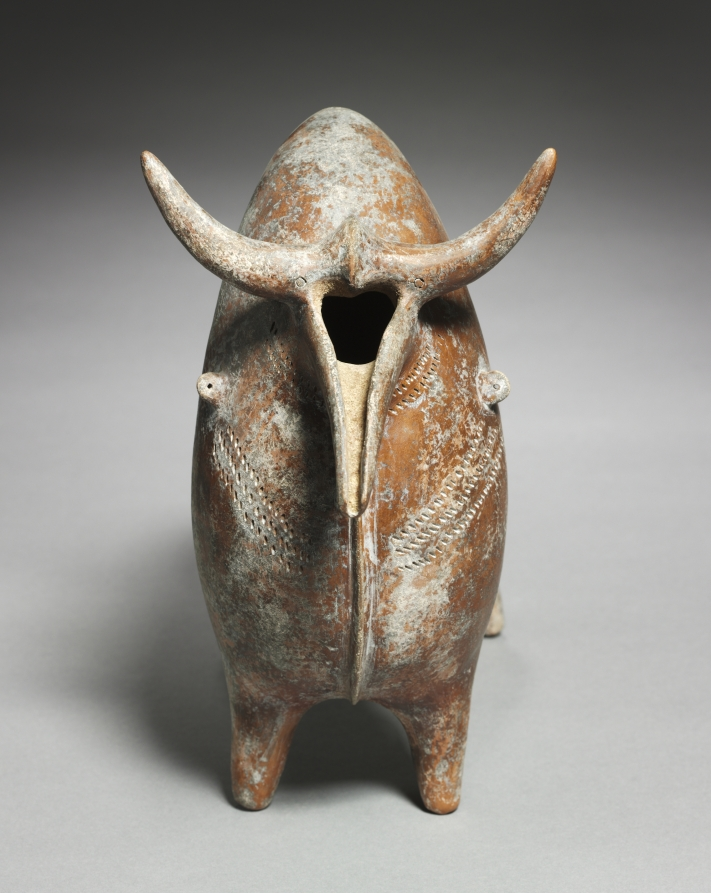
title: Spouted Zebu Vessel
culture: Iran, Marlik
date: c. 1000 BCE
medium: earthenware, burnished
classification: Ceramic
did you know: A zebu, sometimes known as humped cattle, is a species of domestic cattle originating in South Asia.